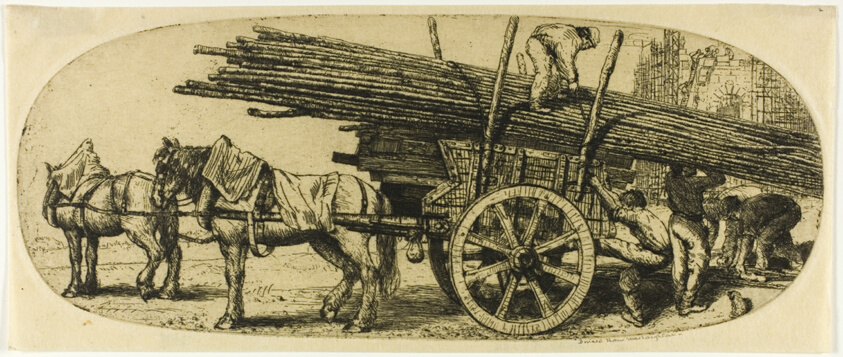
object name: Print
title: The Builders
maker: Donald Shaw MacLaughlan (American, born Canada, 1876-1938)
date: 1904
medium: Etching in black on cream wove paper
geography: United States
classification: etching; print; prints and drawing